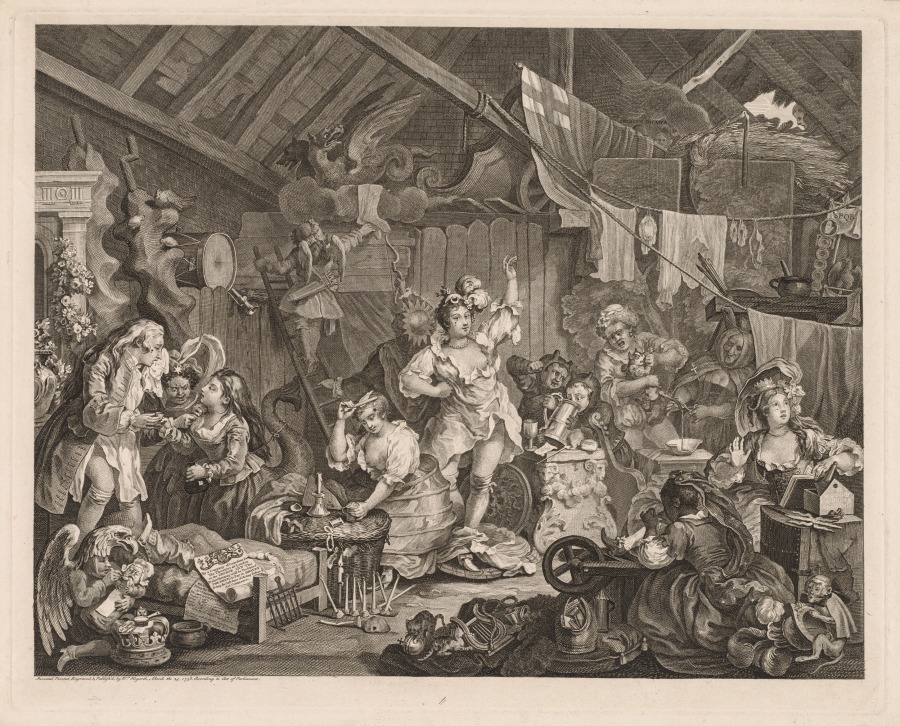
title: Strolling Actresses Dressing in a Barn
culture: England, 18th century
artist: William Hogarth (British, 1697–1764)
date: 1738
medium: engraving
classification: Print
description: Known for his satire, William Hogarth considered this print a protest of British prime minister Robert Walpole’s Licensing Act of 1737, which gave the government power to heavily censor theatrical productions. A reference to the act appears on a large crown in the left foreground, near a playbill. Still, Hogarth poked fun at the somewhat indulgent lifestyle of players by juxtaposing the actresses’ challenging reality with the stage sets and costumes that portray lofty classical deities and the heavens. The shabby and chaotic backstage is made more so by the hefty consumption of wine and other alcoholic beverages, even among younger people.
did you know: The playful irreverence of this backstage scene is underscored by the kittens in the foreground, one of whom plays with a globus cruciger, or cross-bearing orb, recognized as a symbol of authority throughout the Christian world.